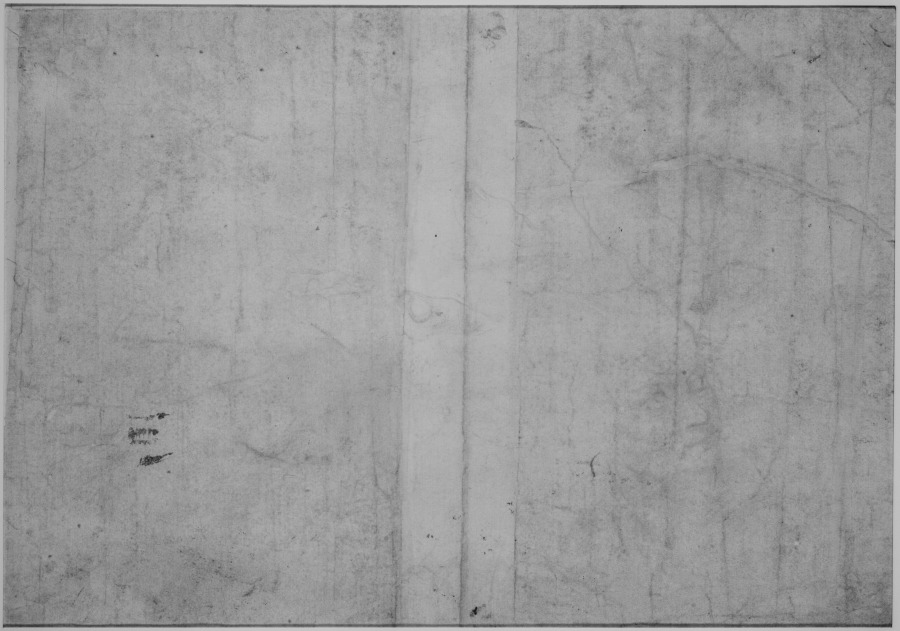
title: Figure Studies for the Sistine Ceiling (verso)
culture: Italy, 16th century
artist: Michelangelo Buonarroti (Italian, 1475–1564)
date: 1510–11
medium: red chalk heightened with traces of white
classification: Drawing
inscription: upper center, in brown ink: 82 (?); upper right, in brown ink: V./.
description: Universally considered one of the greatest artists of the Italian Renaissance, Michelangelo devoted four years to painting the vast ceiling fresco in the Sistine Chapel. This preparatory study portrays one of the 20 athletic male nudes, known as ignudi, who serve as supporting figures at each corner of the Old Testament scenes painted down the center of the ceiling. Michelangelo worked out the positioning of the ignudi in red chalk drawings before beginning to paint each section of wet plaster. The energy and monumentality of the figure in red chalk, whose body extends beyond the sheet, suggests the heroic athleticism of Michelangelo’s sculpture.